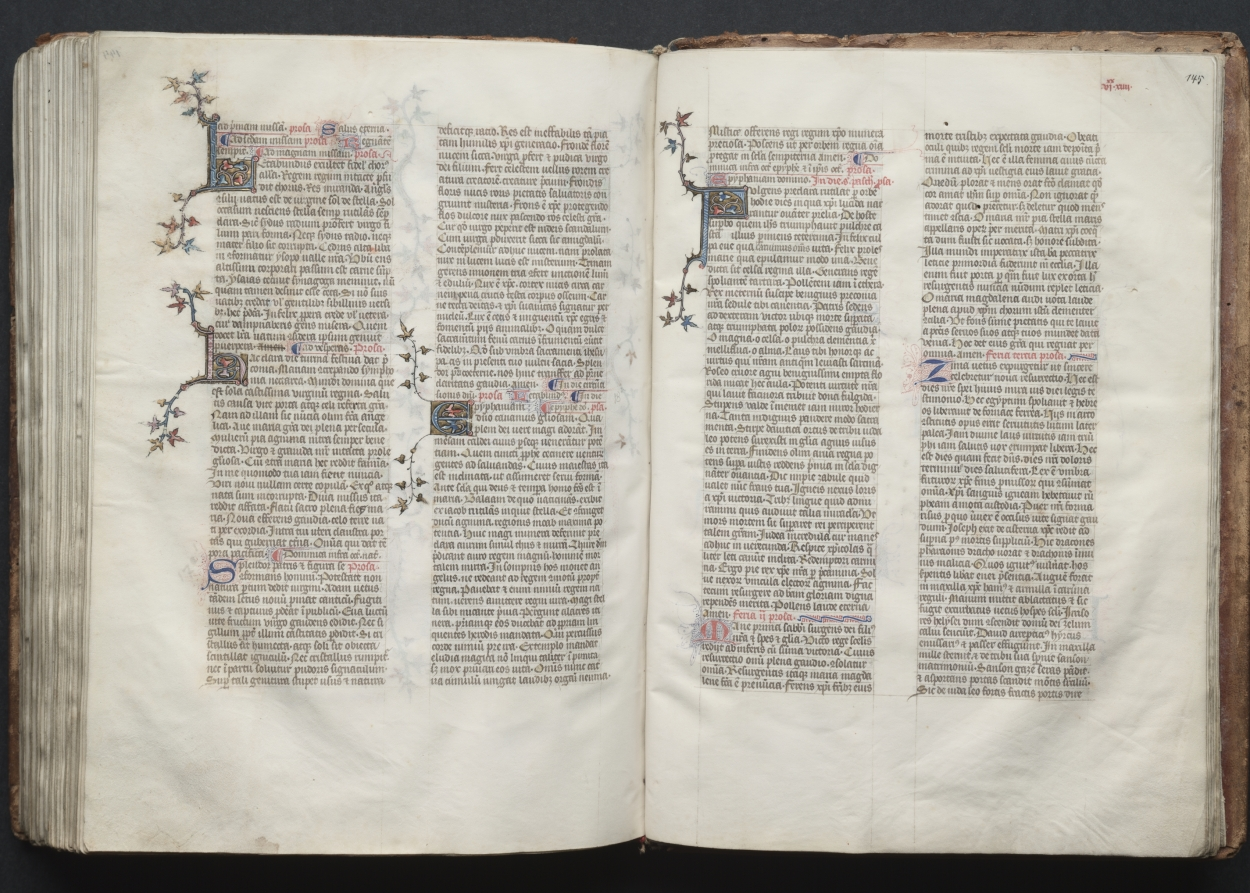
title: The Gotha Missal: Fol. 144v, Text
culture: France, Paris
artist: Master of the Boqueteaux (French)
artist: and Workshop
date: c. 1375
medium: ink, tempera, and gold on vellum; blind-tooled leather binding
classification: Bound Volume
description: The style and quality of this manuscript's decoration is typical of deluxe Parisian books made for aristocratic or royal patrons. Most of the book's decoration appears to be the work of the Master of the Boqueteaux, an artist active at the court of King Charles V (died 1380). His style was apparently shared by a number of book illuminators working in and around Paris. It is very possible that the Gotha Missal belonged to Charles V, but is not provable because the manuscript has no royal portraits and lacks a colophon. Given the book's magnificent decoration, however, it would seem that it was produced for a Valois prince, if not for the king himself. The manuscript receives its name from the German dukes of Gotha, its later owners.